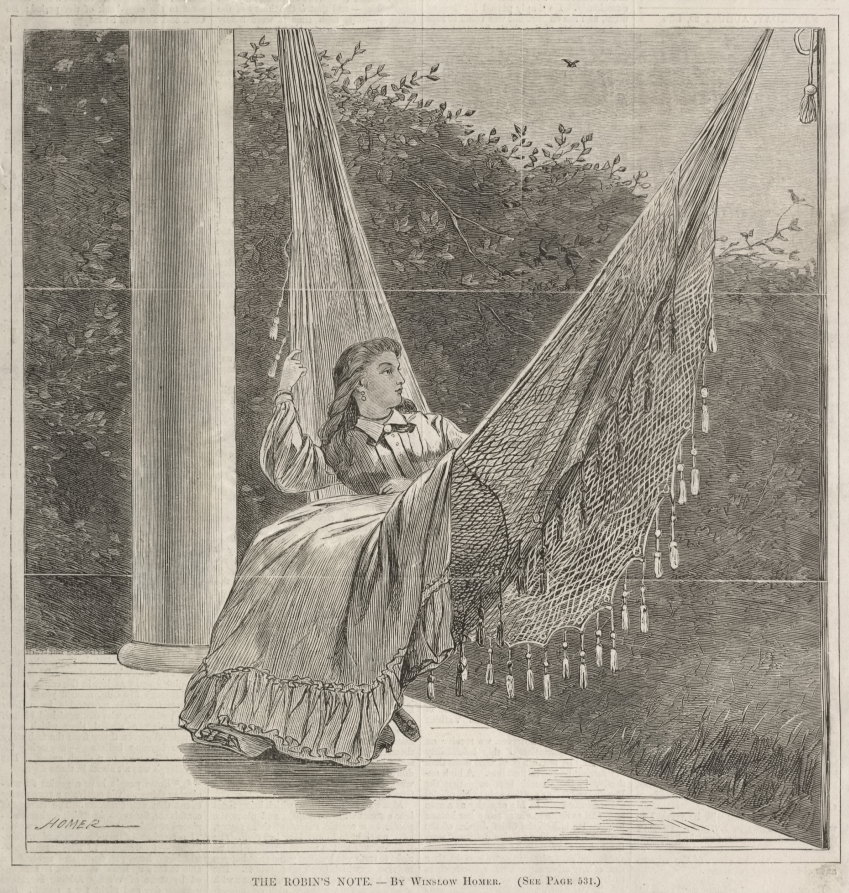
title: The Robin's Note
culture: America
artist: Winslow Homer (American, 1836–1910)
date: 1870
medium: wood engraving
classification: Print